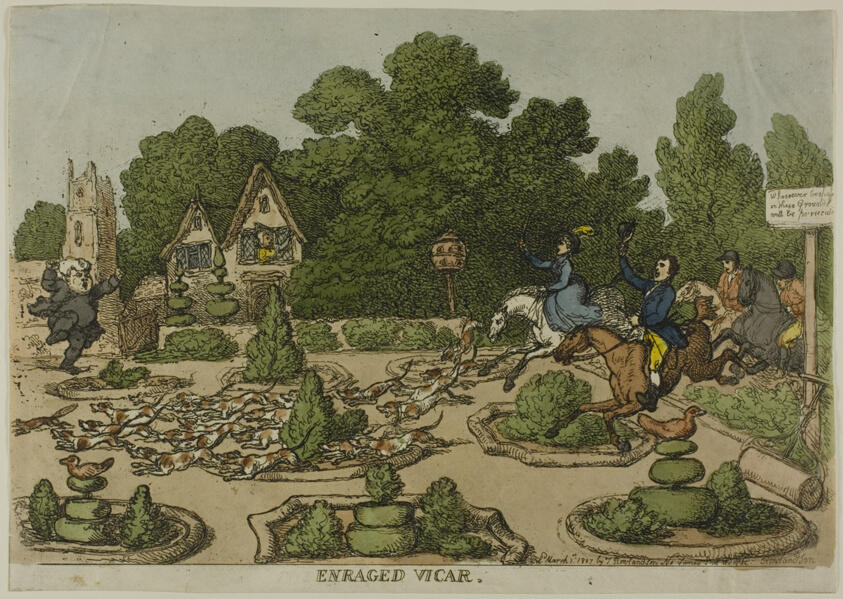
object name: Print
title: Enraged Vicar, from Miseries of Human Life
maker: Thomas Rowlandson (English, 1756-1827); published by Rudolph Ackermann (English, 1734-1834)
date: published March 1, 1807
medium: Hand-colored etching on ivory wove paper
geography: England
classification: etching; print; prints and drawing